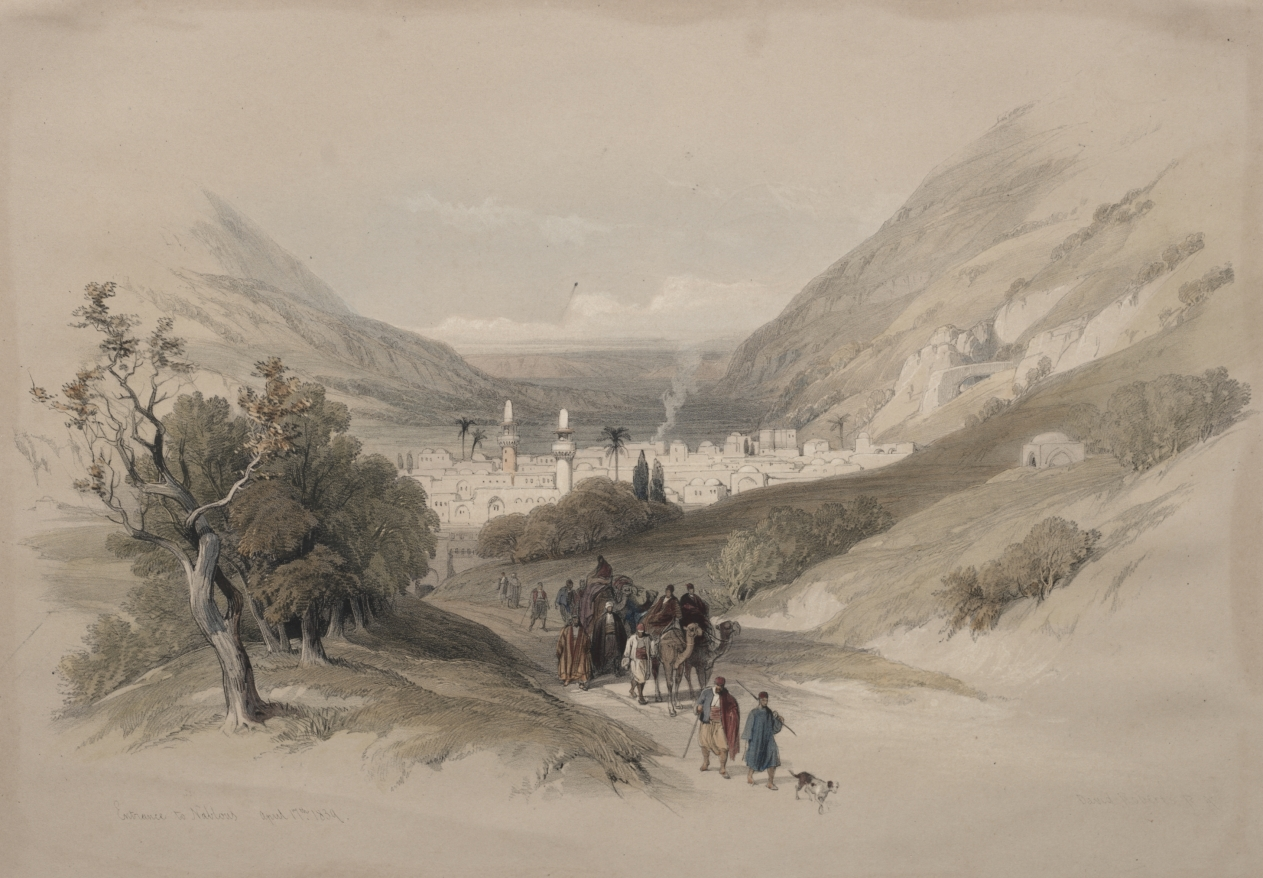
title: Entrance to Nablus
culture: England, 19th century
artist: David Roberts (Scottish, 1796–1864)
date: 1839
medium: color lithograph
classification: Print